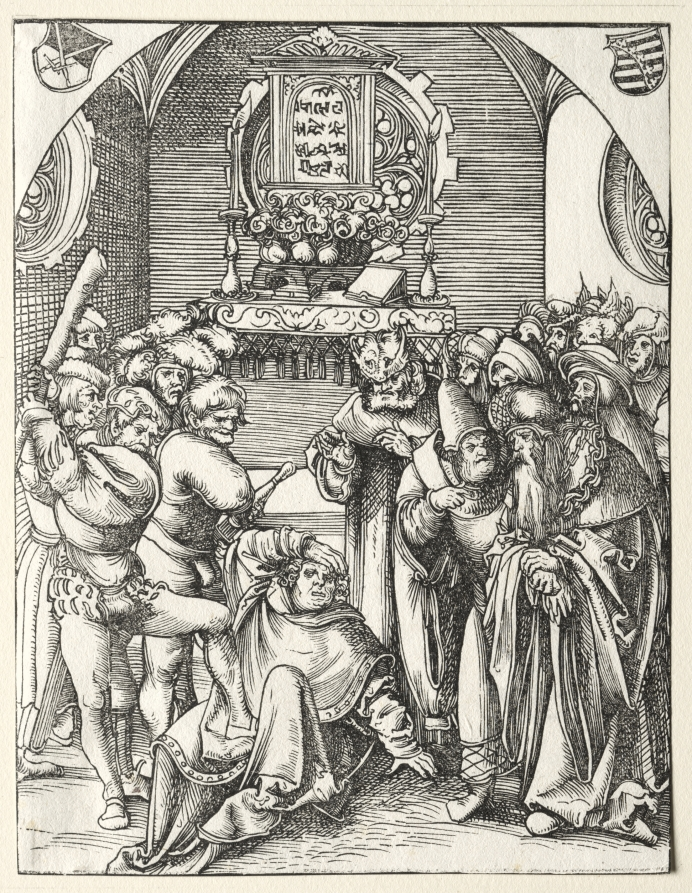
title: Martyrdom of St. Judas Thaddeus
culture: Germany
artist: Lucas Cranach (German, 1472–1553)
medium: woodcut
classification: Print